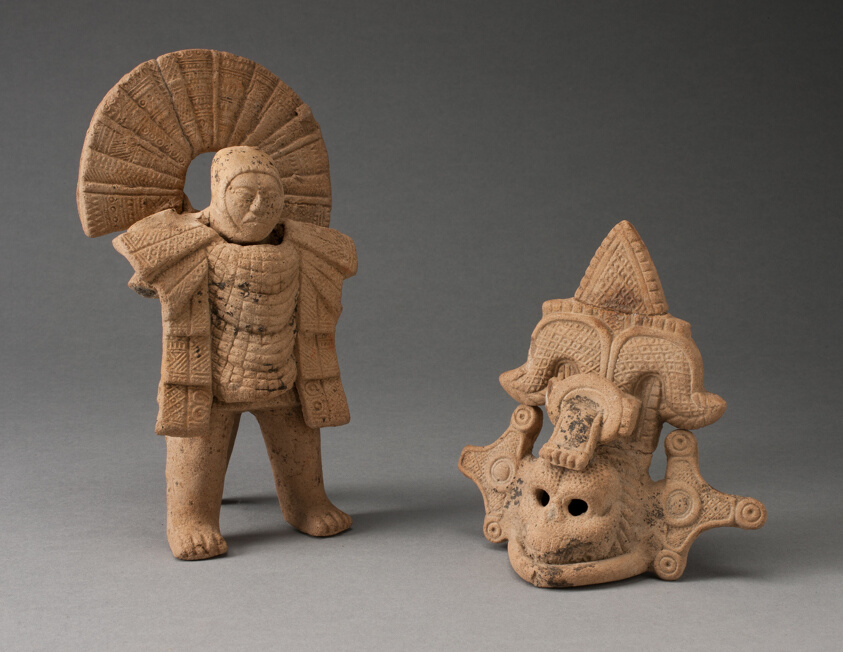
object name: Sculpture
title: Figure of a Standing Warrior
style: Nōpiloa, Arts of the Americas, veracruz, mesoamerican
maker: Nopiloa (South-central Veracruz, Mexico)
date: 600–900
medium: Ceramic and pigment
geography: Veracruz state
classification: earthenware; art of the americas; ceramics; sculpture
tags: people